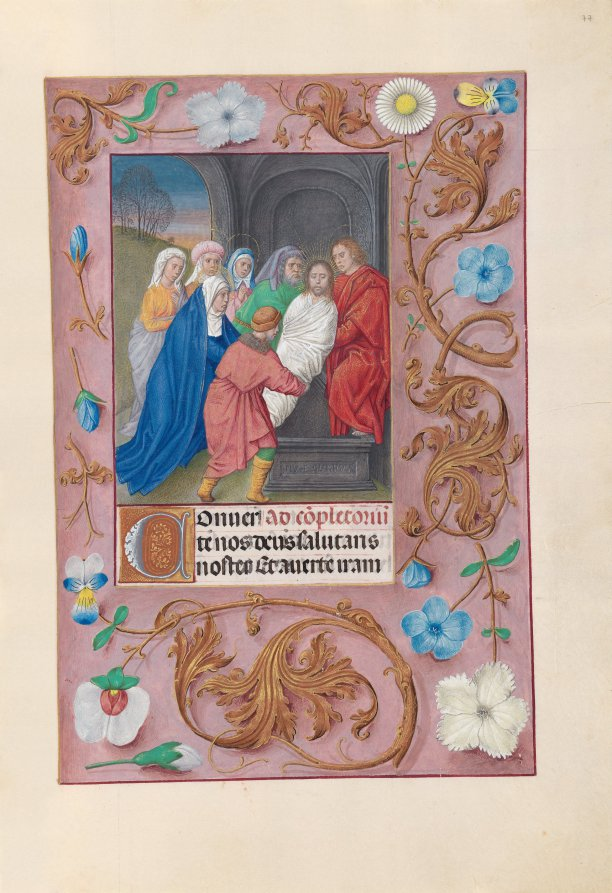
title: Hours of Queen Isabella the Catholic, Queen of Spain: Fol. 77r, Entombment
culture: Flanders, Ghent and Bruges, late 15th century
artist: Master of the First Prayerbook of Maximillian (Flemish, c. 1444–1519)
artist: and Associates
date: c. 1500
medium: ink, tempera, and gold on vellum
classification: Bound Volume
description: This manuscript was illuminated by a circle of at least five highly organized manuscript painters active in the Flemish cities of Ghent and Bruges. The principal illuminator was Alexander Bening, who painted the majority of the book's miniatures. Manuscripts produced by this circle of artists are renowned for the decoration of their borders, which typically feature a rich variety of realistically-painted flowers, birds, and butterflies. This prayer book, called a book of hours, was intended not for a cleric, but for the private devotions of a lay person-in this case, Isabella the Catholic, Queen of Spain (1451-1504). Isabella's coat of arms embellishes the book's frontispiece. It is unlikely that the book was commissioned by the Queen herself; rather, she probably received it as a diplomatic gift from someone courting her patronage, perhaps Cardinal Francisco Jimenez de Cisneros. A Franciscan friar, Jimenez was dependent upon Isabella for his advancement, first to the post of Queen's confessor in 1492, and then to Archbishop of Toledo in 1495.